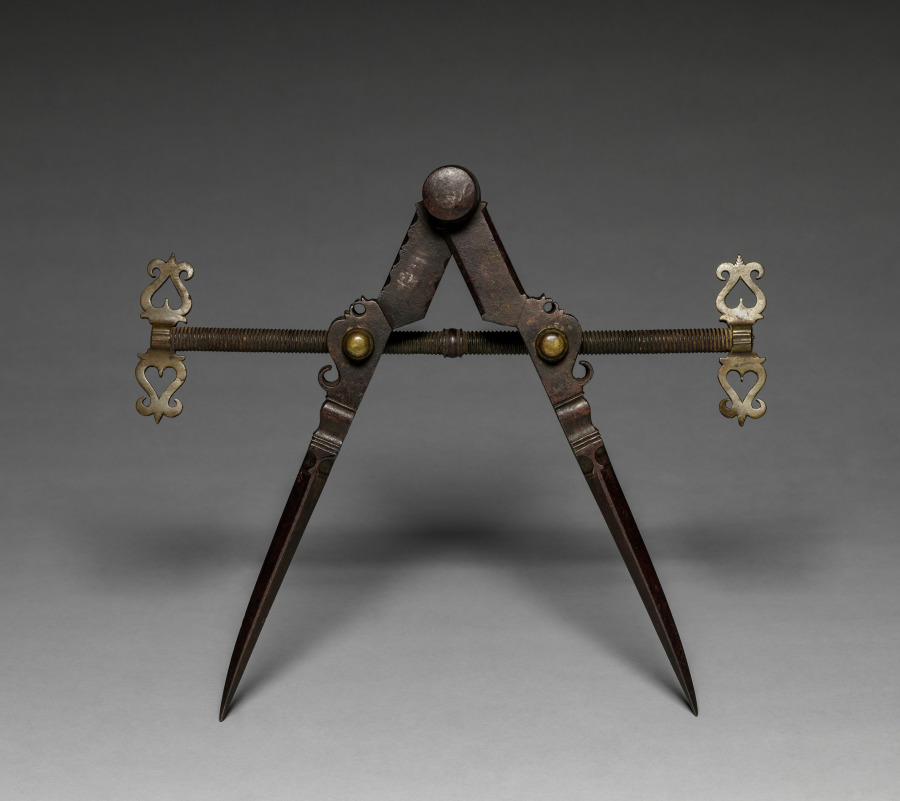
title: Dividers with Regulator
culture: Germany (?)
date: 1500s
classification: Tool